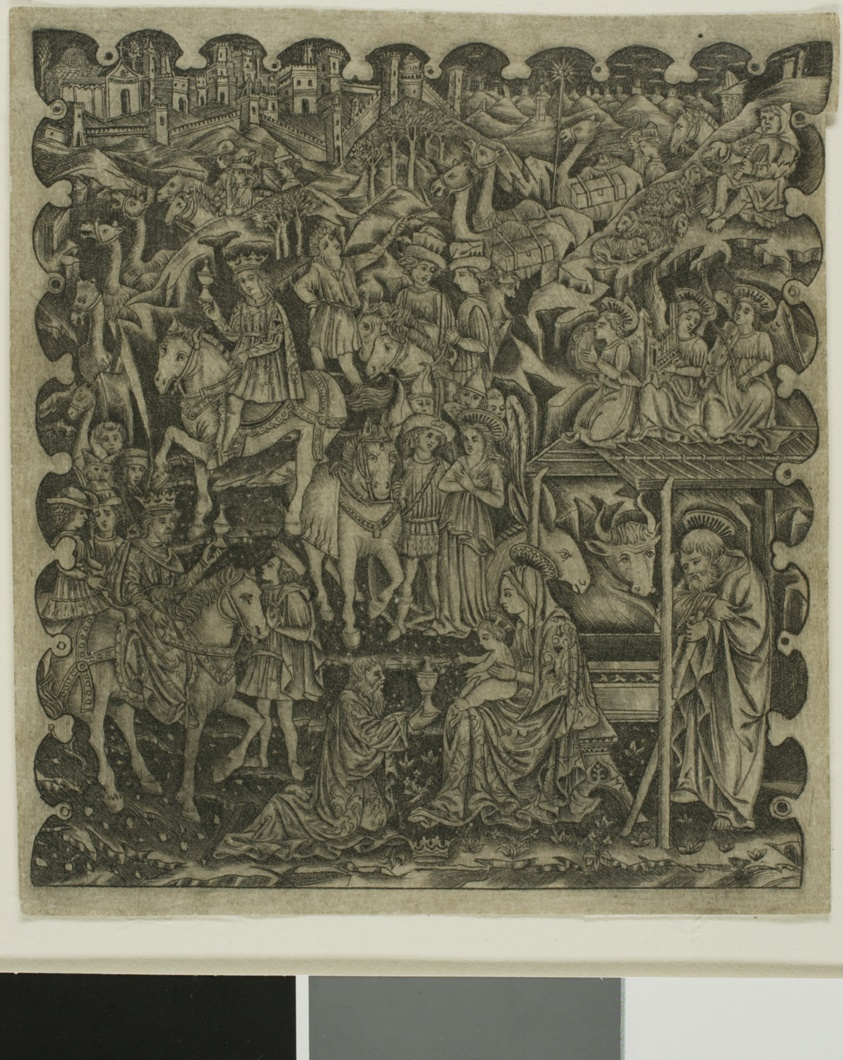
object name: Print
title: Adoration of the Magi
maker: Unknown Artist, possibly Florentine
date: 1450–64, printed in the 18th century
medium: Engraving on paper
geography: Italy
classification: engraving; print; prints and drawing